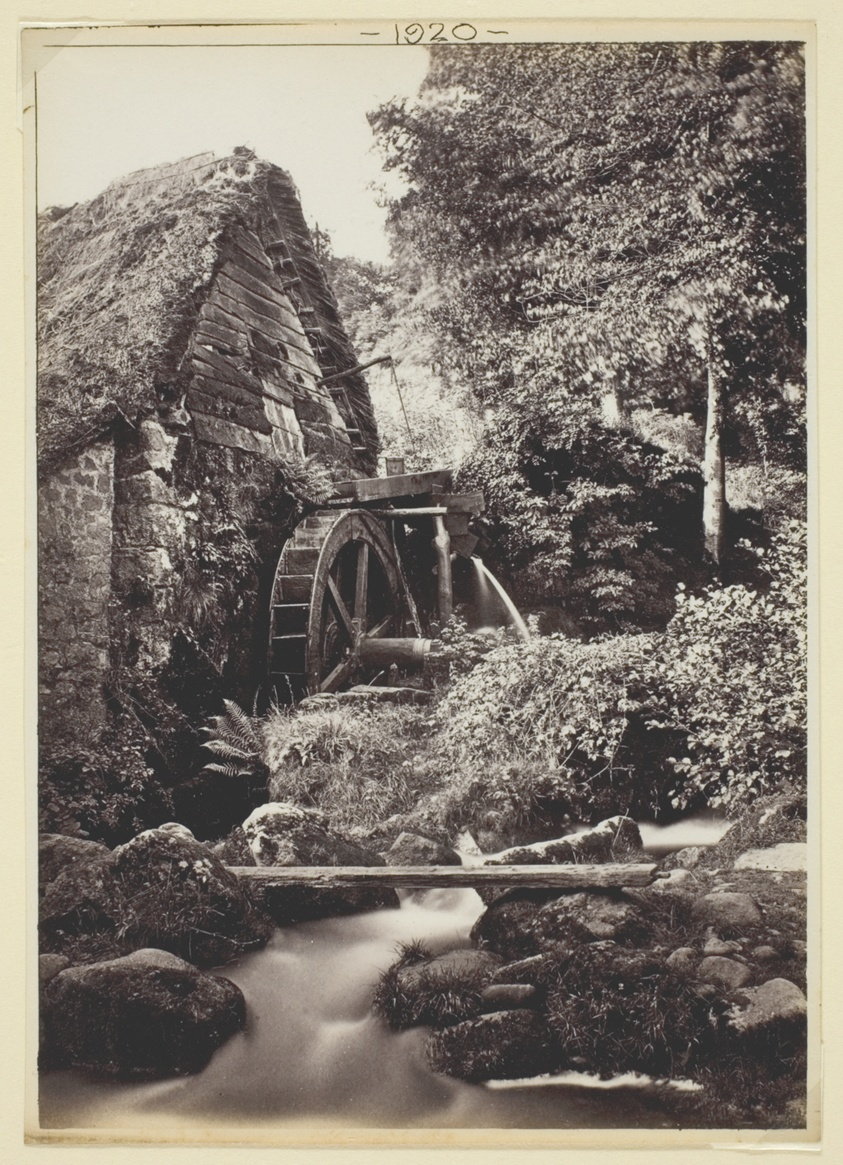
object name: Photograph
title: Untitled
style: 19th century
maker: Francis Bedford (English, 1816–1894)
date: 1860/94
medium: Albumen print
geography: England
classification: albumen silver print; photographic process; photography; photograph